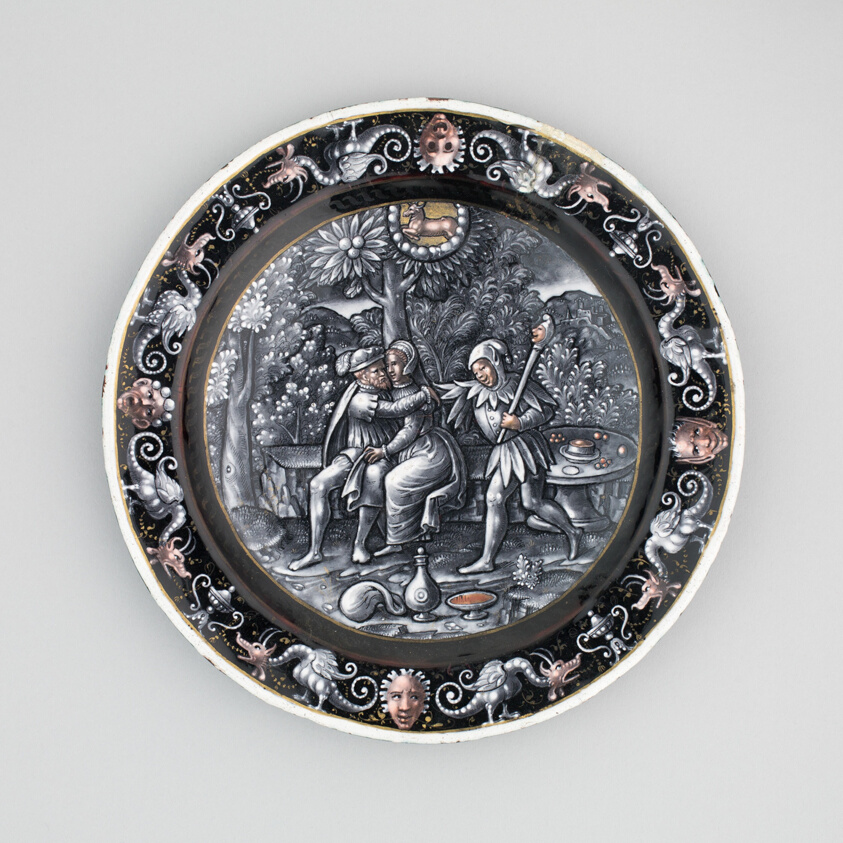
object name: Metalwork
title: Plate with Scene of the Month of April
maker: Workshop of Master I.C.; (French, active 1553-85)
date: 1500/1600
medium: Painted enamel on copper with traces of gilding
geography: Limoges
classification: porcelain; ceramics; european decorative arts; decorative arts